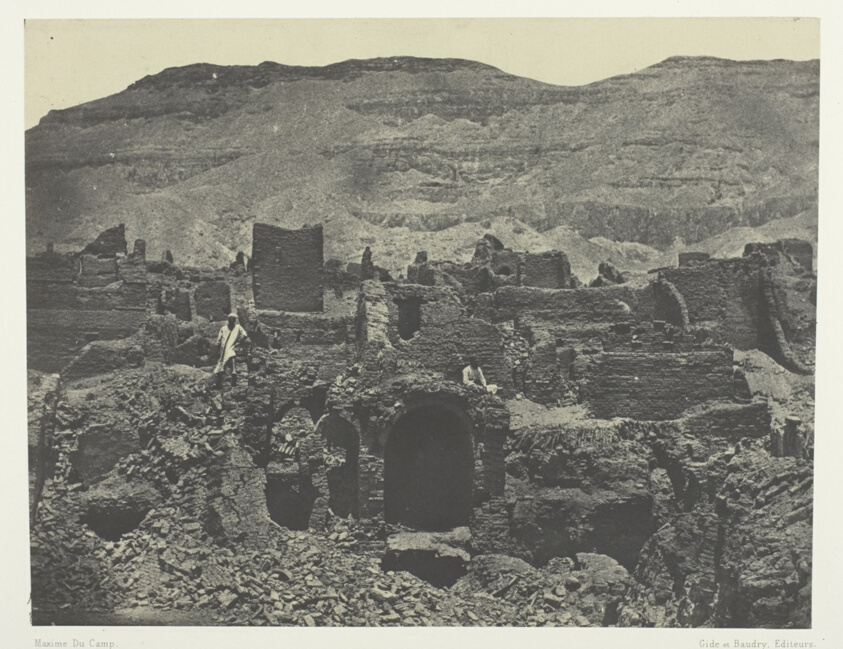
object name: Photograph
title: Médinet-Habou, Ruines de la Ville de Papa; Thèbes, plate 53 from the album "Egypte, Nubie, Palestine et Syrie" (1852)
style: 19th century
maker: Maxime Du Camp (French, 1822–1894); printed by the Imprimerie Photographique de Blanquart-Evrard (French, founded 1851)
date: 1849/51, printed 1852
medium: Salted paper print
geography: France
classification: salted paper print; photographic process; photography; photograph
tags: Collected by Hugh Edwards, Egypte, Nubie, Palestine et Syrie